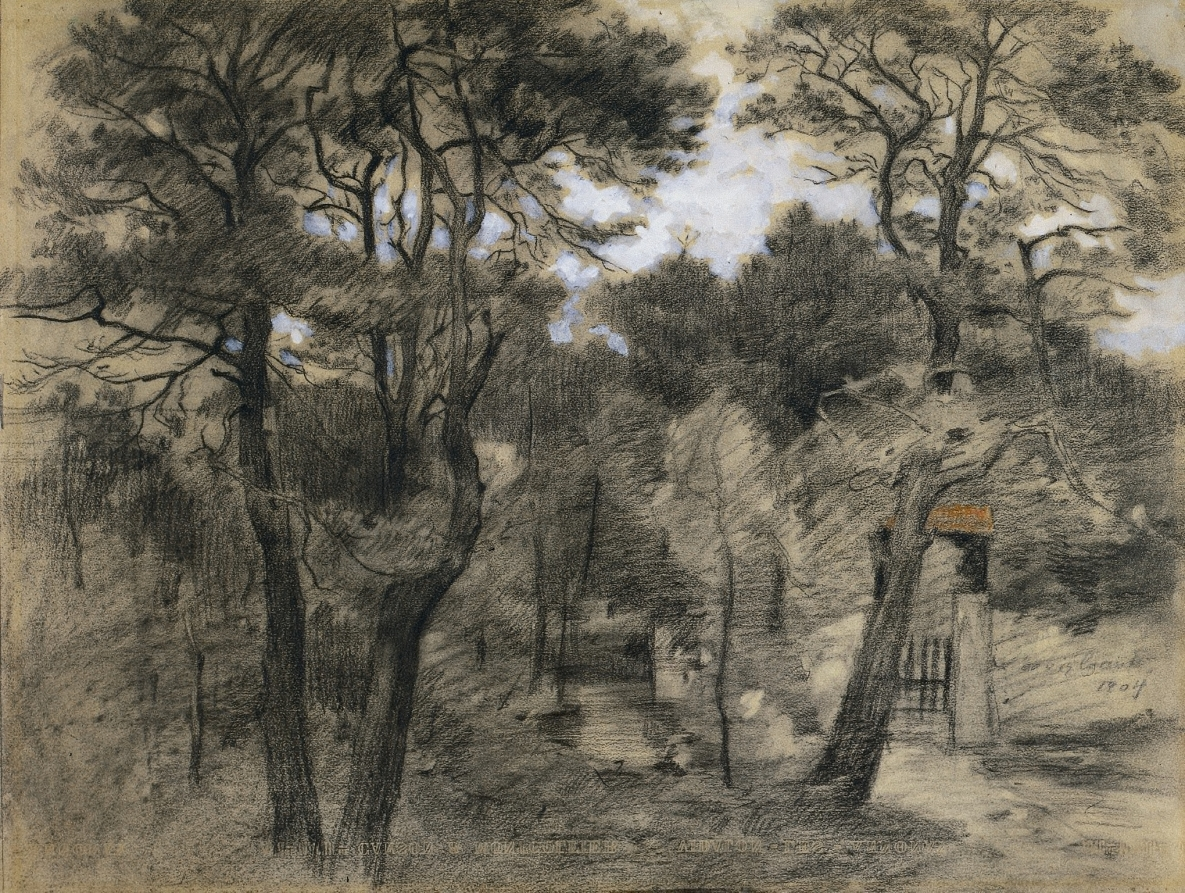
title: Landscape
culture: Germany, early 20th Century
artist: Lovis Corinth (German, 1858–1925)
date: 1904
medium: charcoal with orange pastel and white gouache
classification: Drawing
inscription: signed, lower right, in charcoal: Lovis Corinth / 1904 ; VERSO, upper left, in graphite: cust[illegible] / [auf?] P[illegible] / gi[illegible] RV / [illegible] [upsidedown] ; upper right, in graphite: [illegible] [sideways] ; center, in graphite: 131 g[illegible] [upsidedown] ; lower right, in charcoal: [illegible]trom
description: A seasoned draftsman, Corinth produced more than 2,000 drawings over the course of his life. An elaborate crosshatch pattern of tightly packed charcoal lines creates this naturalistic view of a wooded landscape. The pale sky, described with white gouache on a tan sheet, suggests a cold, gray day; the palette is restrained except for a vibrant square of orange delineating the roof of a shed.